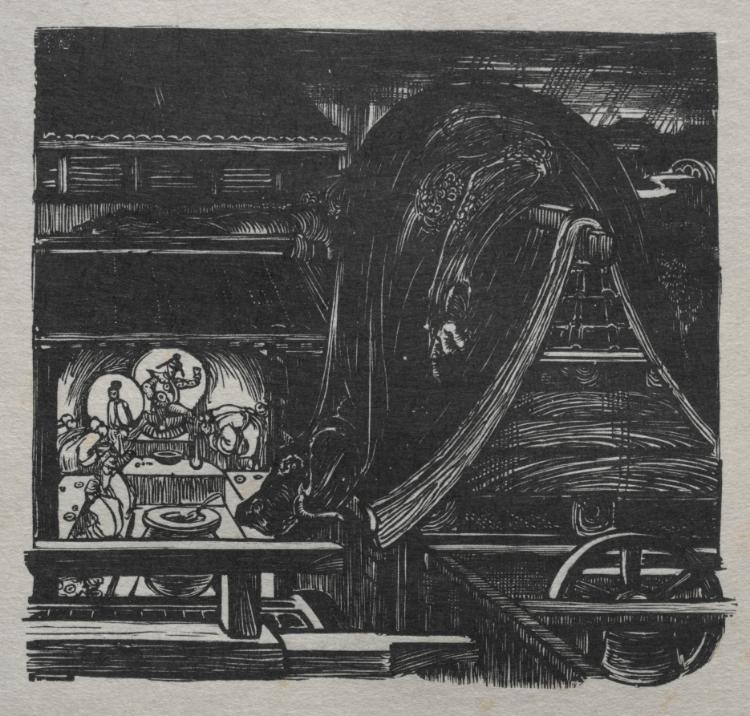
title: The Dragon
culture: England, 20th century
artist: Charles de Sousy Ricketts (British, 1866–1931)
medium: woodcut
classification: Print